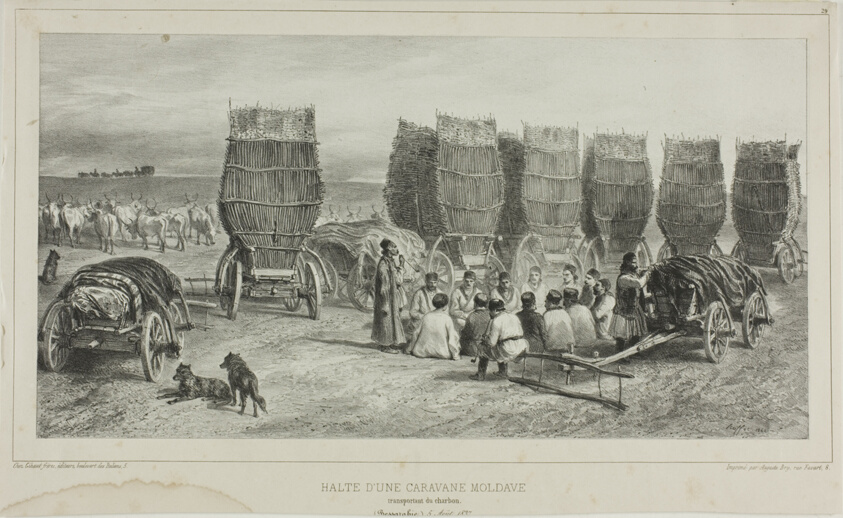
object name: Print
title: Halting Place of a Moldavian Caravan Transporting Coal, Bessarabia, August 5, 1837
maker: Denis Auguste Marie Raffet (French, 1804-1860); printed by Auguste Bry (French, 19th century); published by Chez Gihaut Frères (French, 19th century)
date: 1840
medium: Lithograph in black on ivory chine laid down on buff wove paper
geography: France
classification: lithograph; print; prints and drawing